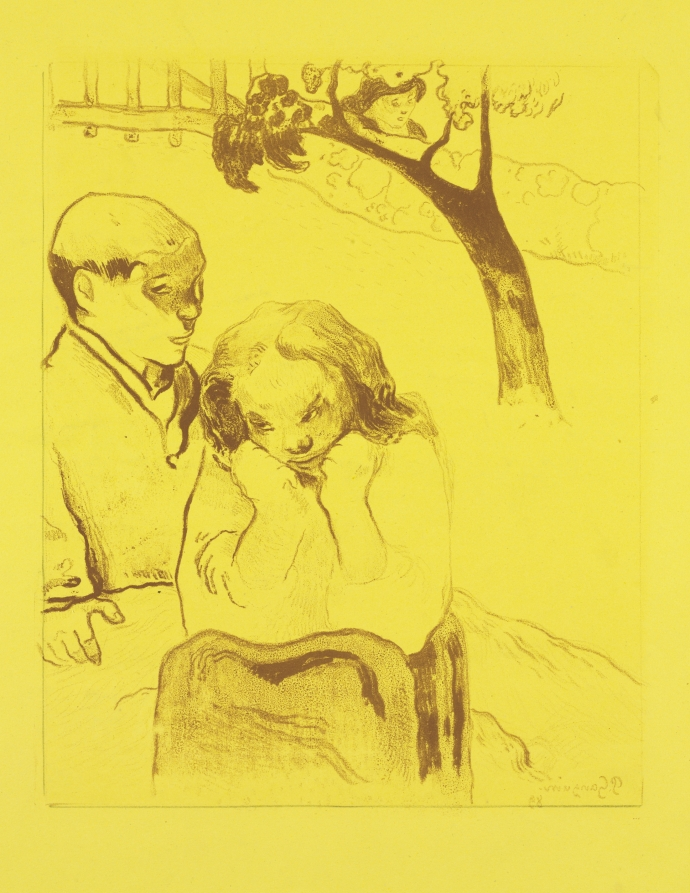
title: Volpini Suite: Human Misery (Misères Humaines)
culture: France, 19th century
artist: Paul Gauguin (French, 1848–1903)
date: 1889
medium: zincograph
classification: Print